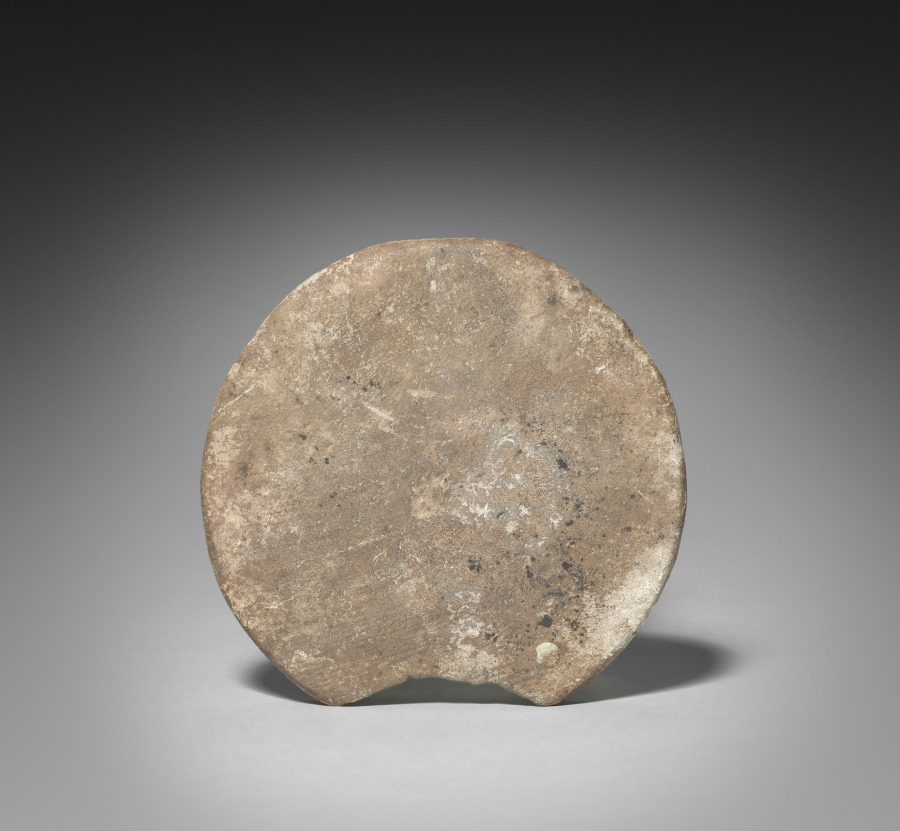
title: Shawabty Jar with Lid (lid)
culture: Egypt, New Kingdom (1540–1069 BCE), Dynasties 19–20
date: 1295–1069 BCE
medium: Nile silt ware; lid of limestone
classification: Funerary Equipment